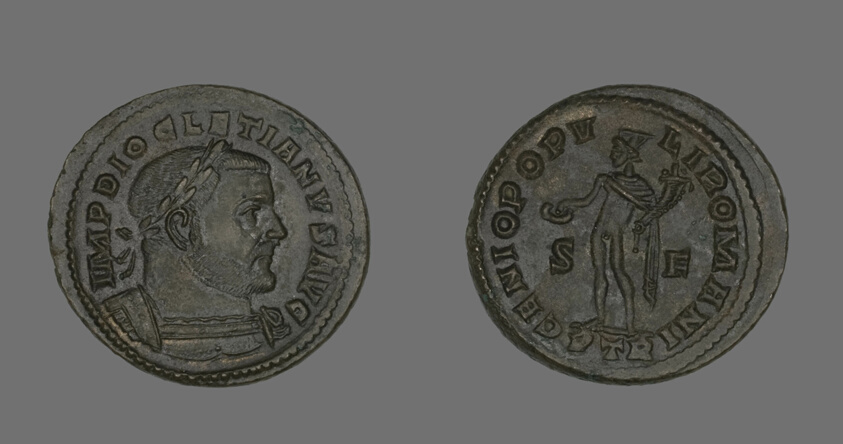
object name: Coin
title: Coin Portraying Emperor Diocletian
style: roman (ancient, style or period)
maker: Roman, minted in Trier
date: 303-305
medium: Bronze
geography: Trier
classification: coin; ancient art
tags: portrait